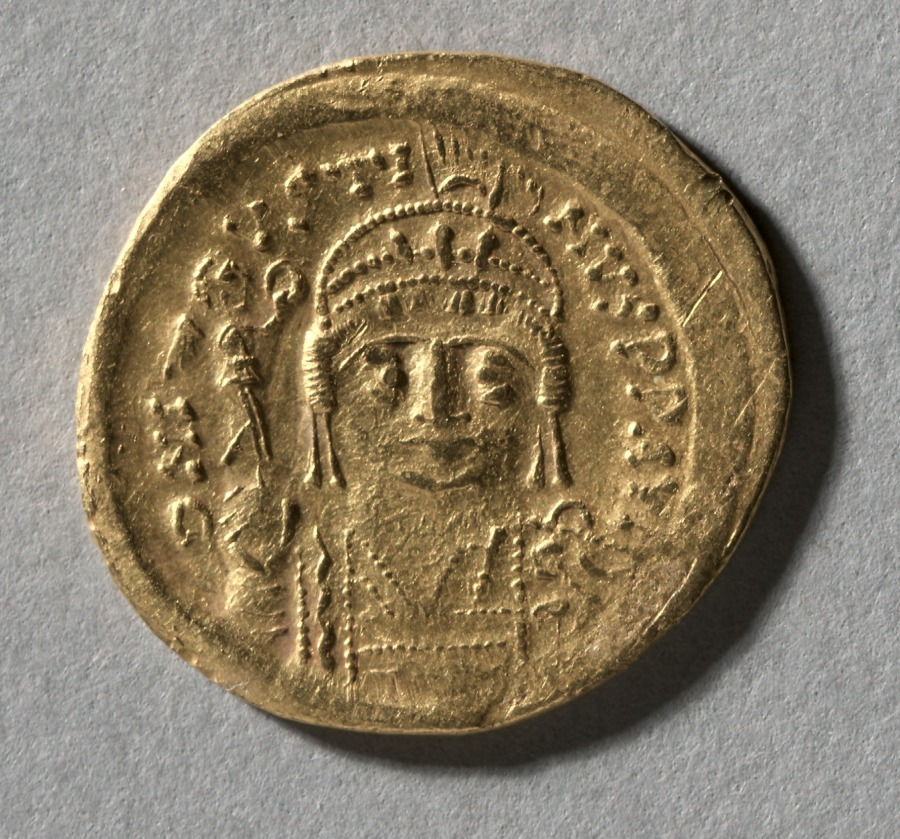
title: Solidus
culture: Byzantine, 6th century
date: 565–578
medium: gold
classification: Coins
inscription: (Avers): DNI VST NVSPPAVI (Revers): VICTORI AAVCCCH and CONOB